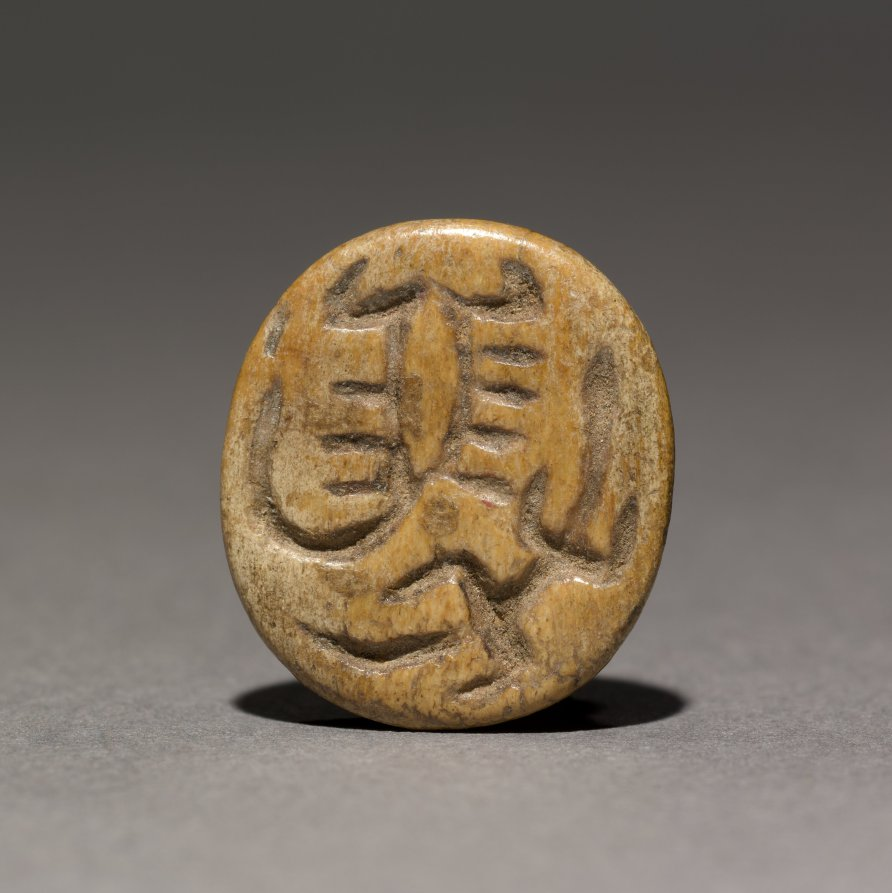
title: Seal Amulet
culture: Egypt, First Intermediate period (2123–2040 BCE)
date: 2123–2040 BCE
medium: bone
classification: Amulets